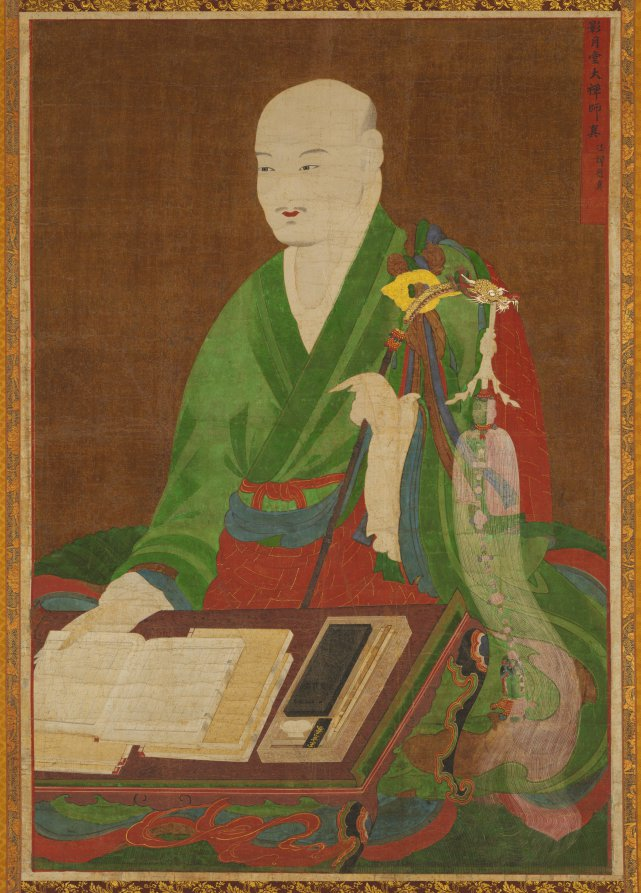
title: Portrait of the Great Master Yeongwoldang Eungjin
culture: Korea, Joseon dynasty (1392–1910)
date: 1700s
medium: hanging scroll, ink, color and gold on silk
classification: Painting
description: The monk in this portrait, identified by an inscription in a red cartouche at the upper right of this painting, is the Great Master Yeongwoldang Eungjin. Portraits of this type, painted following the death of an important Buddhist monk, are known as jinyeong. His elevated status is indicated by his fine monastic garments, the dragon-headed ceremonial fly whisk he holds in his left hand, and the Buddhist scripture in his right hand. The writing box on his desk, with brushes, ink stone, and water dropper, further emphasizes his prowess as a man of deep insight into the Buddhist teachings.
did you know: In East Asian Buddhist temples, portraits of Buddhist monks are housed in special dedicated halls as icons of spiritual ancestors to the community of Buddhist monks and nuns.